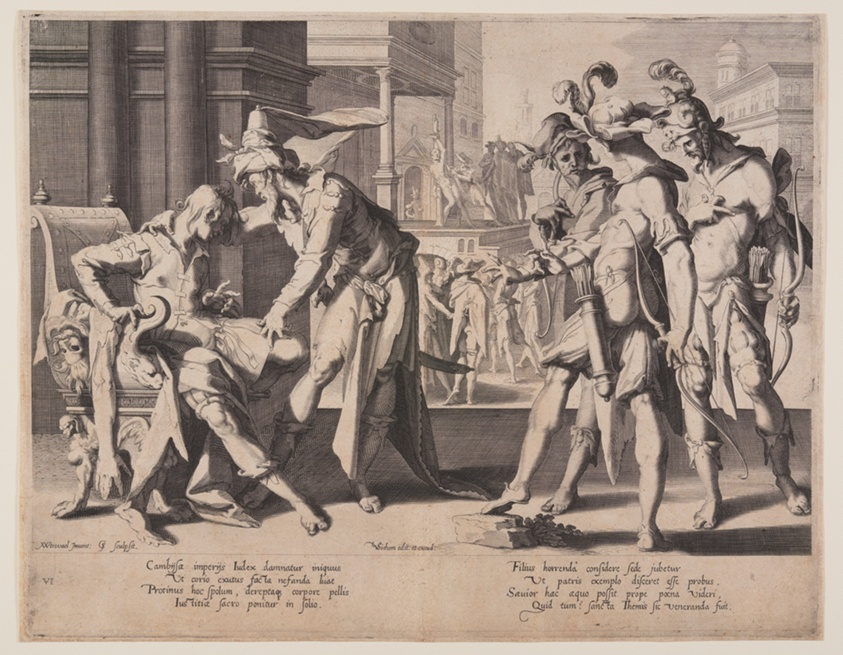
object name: Print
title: Cambyses Commanding Flaying, plate 6 from Thrones of Justice (Thronus Iustitiae)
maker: Willem van Swanenburgh (Dutch, 1580–1612); after Joachim Wtewael (Dutch, 1566–1638)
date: 1606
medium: Engraving on ivory laid paper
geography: Netherlands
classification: print; paper; prints and drawing; engraving